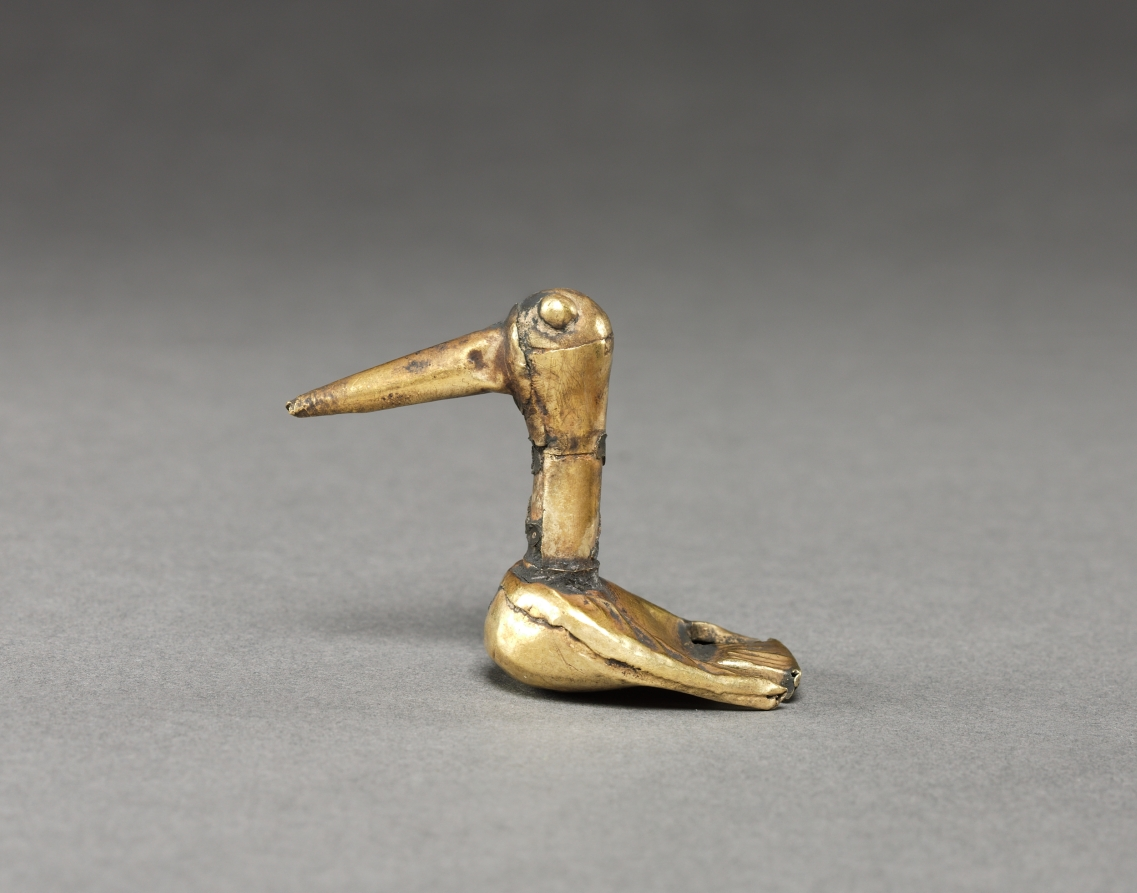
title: Bird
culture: Peru, North Coast, Chimú Culture, 13th-15th century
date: 1200s-1400s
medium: bronze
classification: Metalwork